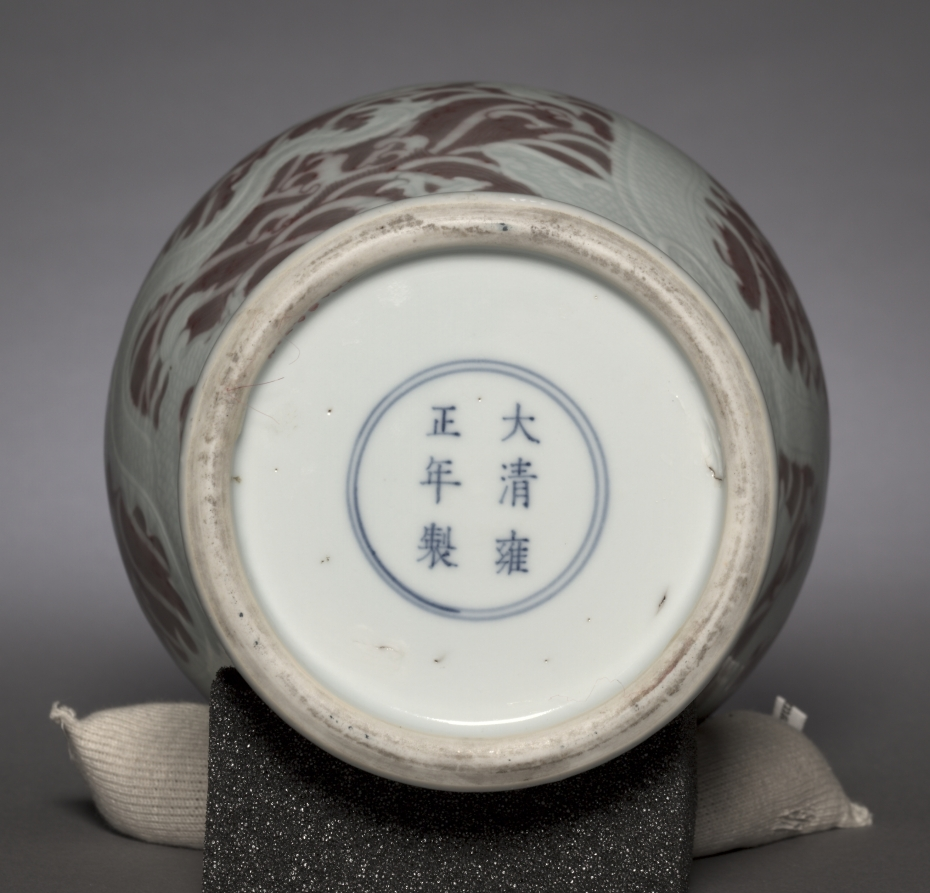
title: Meiping (Prunus) Vase with Dragons in Waves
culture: China, Jiangxi province, Jingdezhen kilns, Qing dynasty (1644-1911), Yongzheng mark and reign (1723-35)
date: 1723–35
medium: porcelain with incised and underglaze red decoration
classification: Ceramic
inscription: 大清雍正年制